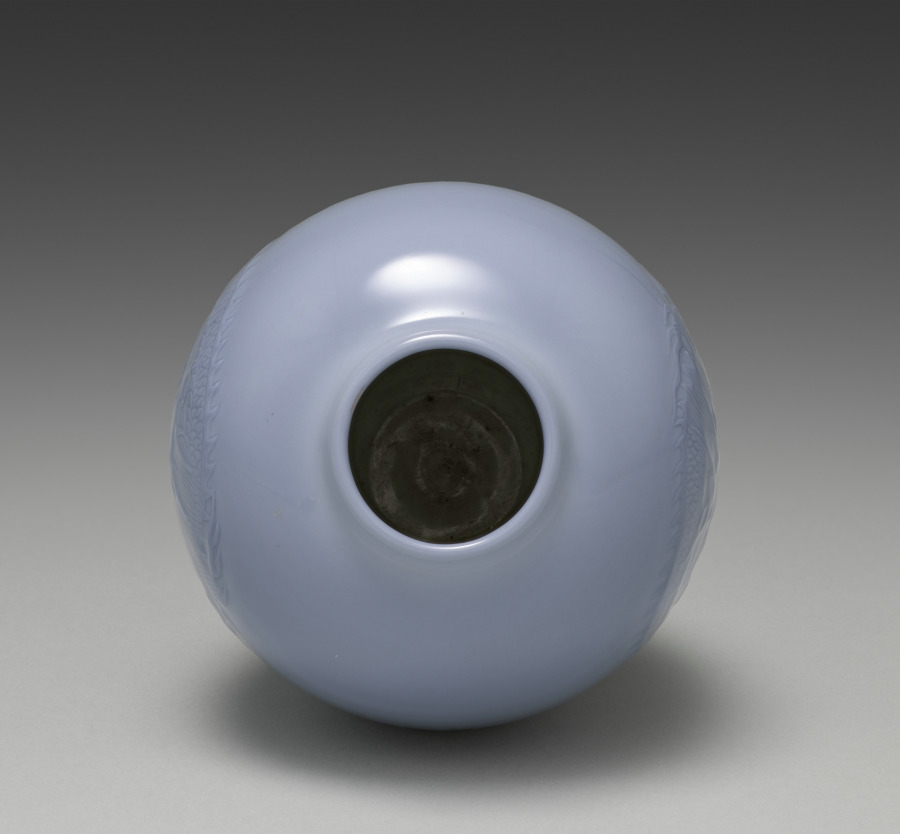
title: Vase with Dragon Roundels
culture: Japan, Meiji period (1868–1912)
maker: Seifū Yohei III (Japanese, 1851–1914)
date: 1900–1914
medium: Porcelain with purple glaze and molded and carved design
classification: Ceramic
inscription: 清風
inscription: 成山清風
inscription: The top of the box lid describes the vase.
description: Each side of this lavender-colored vase is nearly covered with a low-relief design of a four-clawed dragon curled around a flaming jewel. The box lid carries an attestation by Yohei IV that the vase was produced by his predecessor, and the signature on the base is one Yohei III used later in his career. The lid also makes reference to Jun (J. Kin) ware, which was made in numerous kilns in what is now Yuzhou or Yuxian in Henan Province, China, during the Northern Song dynasty. Some Jun wares had an opalescent purple glaze, which was clearly the inspiration for the color seen on this vase.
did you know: Kyoto-based Japanese ceramist Seifū Yohei III (1851–1914) admired the glaze colors found on Chinese porcelain and tried to replicate them through intensive experimentation.